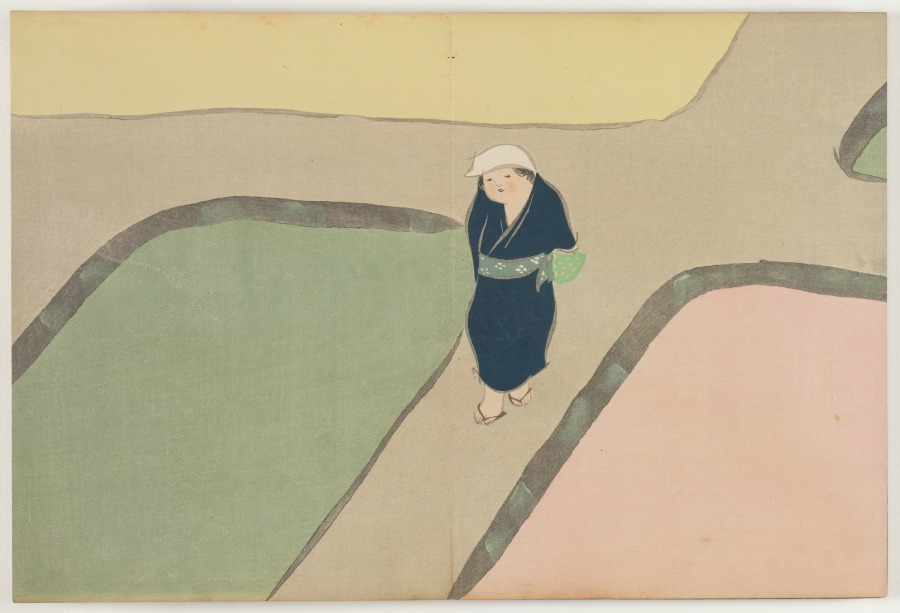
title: Flowers of a Hundred Worlds (Momoyogusa): Spring Field (Haru no tanomo)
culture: Japan, Meiji period (1868–1912)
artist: Kamisaka Sekka (Japanese, 1866–1942)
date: 1909–10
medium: color woodcuts with gold and silver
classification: Bound Volume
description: This print from a set of three woodblock printed albums displays the graphic design prowess of Kamisaka Sekka. The images were first distributed one by one to subscribers to the series but later were reissued in bound form, like this book, for mass consumers. Each print features a vignette taken from nature or Japanese literature. Many of the scenes have a long history in Japan, originating in the 900s or 1000s and having been interpreted by all manner of artists since that time. Sekka’s selections hew closely to precedents from the Rinpa style originated by painter Tawaraya Sōtatsu (c. 1570–c. 1640) and calligrapher Hon’ami Kōetsu (1558–1637).